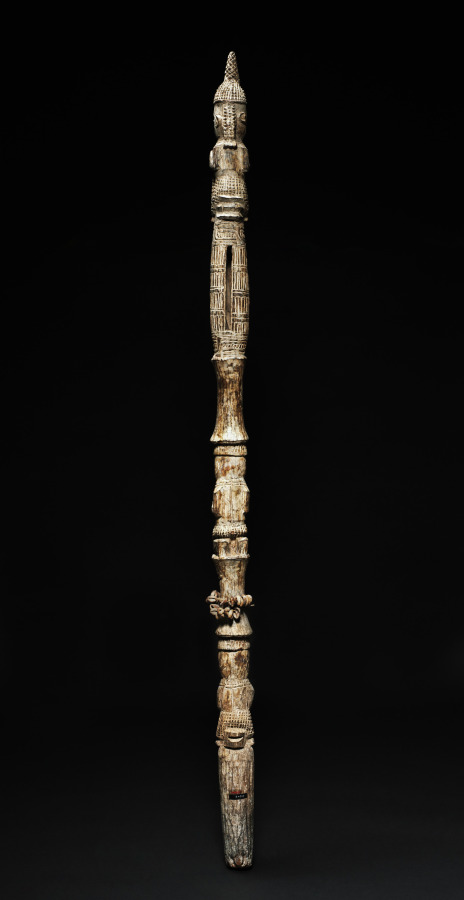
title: Rattle Staff (ukhuhre)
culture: Nigeria, Benin Kingdom, Ẹdo peoples, member(s) of the Igbesanmwan (wood and ivory carvers) guild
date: 1900s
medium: Wood, paint, cowrie shells, and plant fiber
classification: Sculpture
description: Rattle staffs (ukhuhrẹ) are instruments of memory and sound. Though this staff represented a single elite man, it evokes the individuals in his lineage. Inspired by bamboo, it is divided into segments that link three carved men dressed in coral-beaded finery. Benin courtiers still carry these staffs during celebrations and rituals. By banging the staff on the ground, a rattling sound emanates from its open center, where a wooden cylinder rolls freely. The noise alerts ancestral spirits to prayers offered on their behalf. When not in use, they are stored on ancestral altars.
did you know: Rattle staffs (ukhuhrẹ) like this are still used in the Benin Kingdom today.